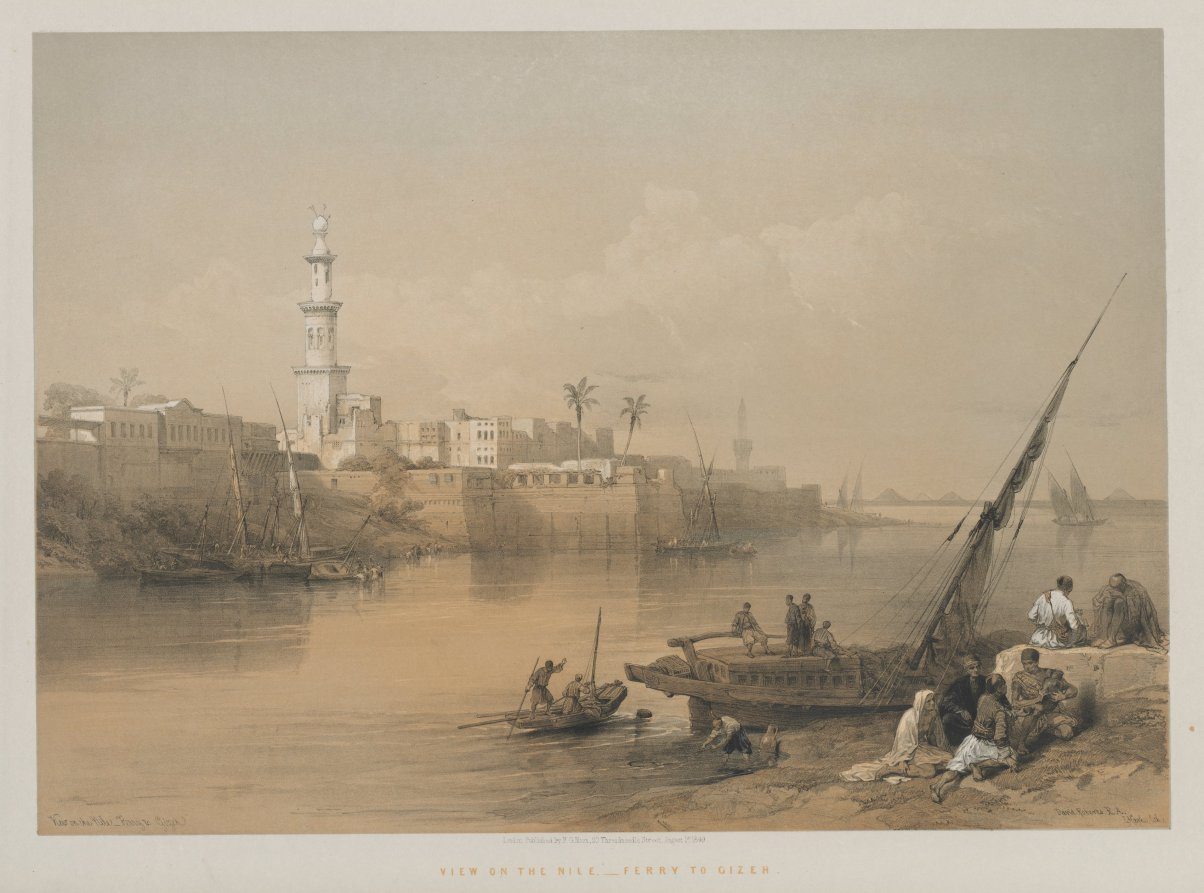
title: Egypt and Nubia, Volume III: View on the Nile, Ferry to Gizeh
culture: England, 19th century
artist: Louis Haghe (British, 1806–1885)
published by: F. G. Moon, 20 Threadneedle Street, London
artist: after David Roberts (Scottish, 1796–1864)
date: 1849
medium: color lithograph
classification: Print